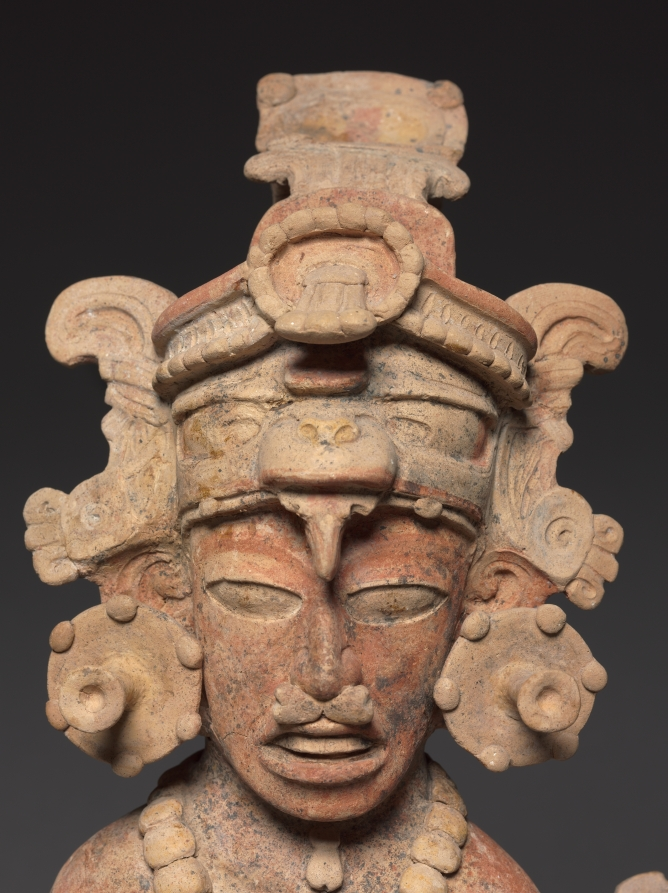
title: Artisan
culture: Guatemala, Petén region, Maya style (250-900), Maya style (250-900)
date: 250–600 CE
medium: earthenware with colored slips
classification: Sculpture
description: These figures represent the supernatural patrons of the visual arts and writing: the brothers Hun Batz and Hun Chuen ("One Monkey" and "One Artisan"). The two were refined artists but also bullies who tormented their younger brothers, who took revenge by transforming their elders into monkeys. Many Maya representations of the painter-scribes immortalize this fate by depicting the pair with both simian and human features, as here. The brothers are shown engaged in artistic or scribal pursuits. Sitting on high-domed bases that may have served as the lids of incense or offering bowls, each apparently once grasped a tool in his upper hand—for instance, a paint brush or a stylus for writing. In the lower hand, one cradles a small mask and the other, a piece of bark that likely refers to the beaten bark from which the Maya made books.